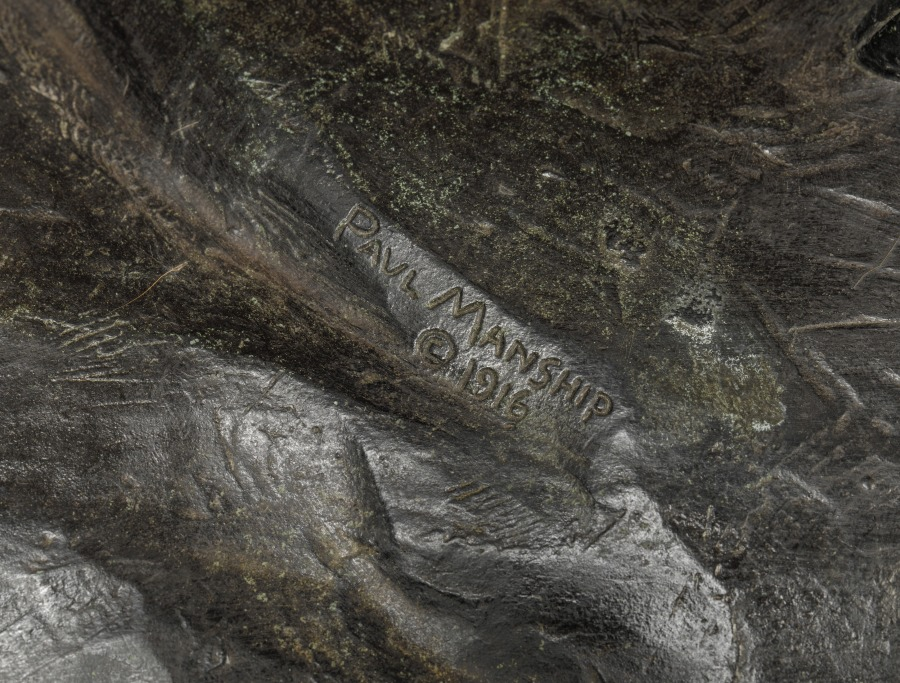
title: Dancer and Gazelles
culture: America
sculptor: Paul Manship (American, 1885–1966)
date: 1916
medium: bronze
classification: Sculpture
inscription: Signed on base: PAUL MANSHIP © 1916.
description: One of Manship’s most popular compositions, this work established his reputation as an important up-and-coming sculptor. Here, his mastery of elegant silhouette is manifest through the gracefully posed dancer and her sleek animal companions. Stylized decorative patterning embellishes the dancer’s hair and swaying skirt.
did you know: Initially interested in painting, Manship opted to pursue sculpture after discovering he had color vision deficiency.